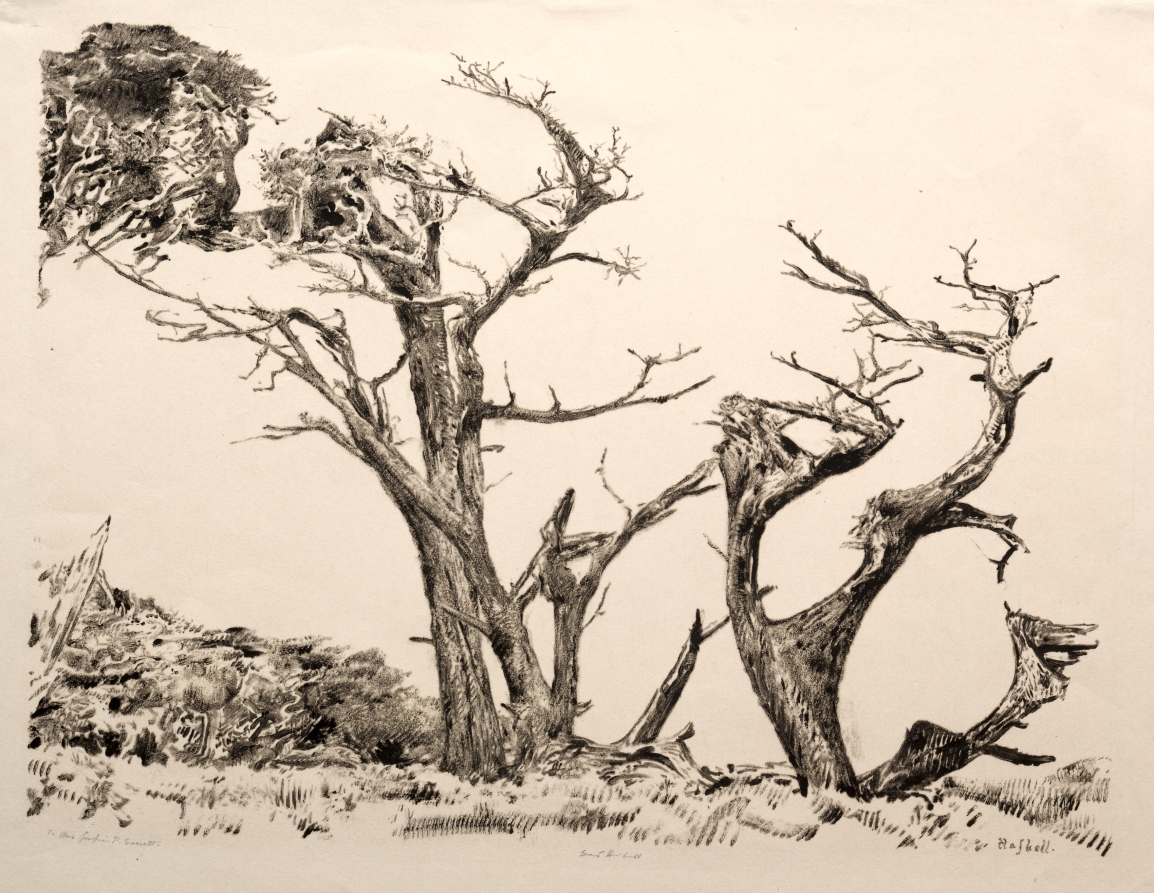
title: Monterey Cypress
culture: America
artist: Ernest Haskell (American, 1876–1925)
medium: monotype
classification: Print